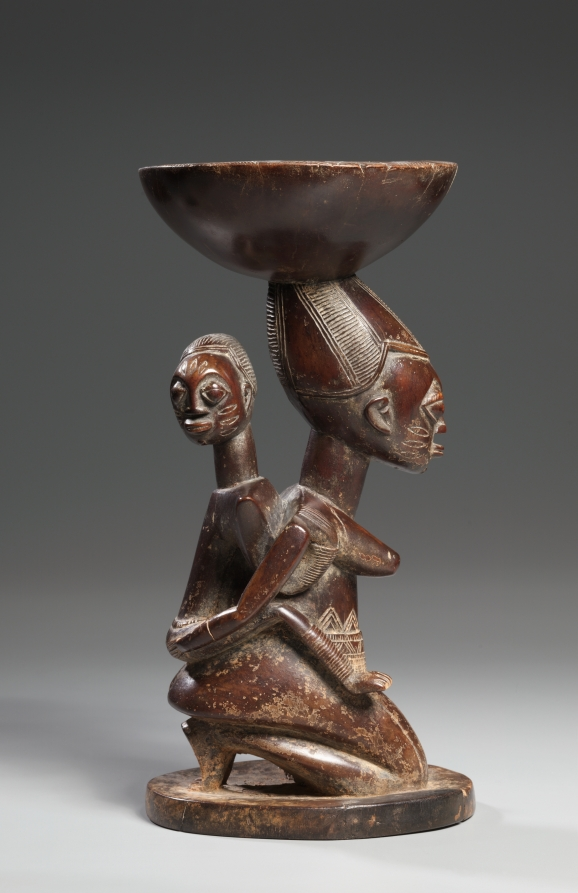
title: Ifá divination vessel (àgéré Ifá)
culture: Africa, West Africa, Nigeria, possibly Èkìtì State, Yorùbá-style carver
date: mid- late 1800s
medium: Wood and colorant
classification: Sculpture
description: The mother figure of this vessel from the Southern Ekiti region represents a devotee who kneels before the gods. The vessel once held the 16 sacred palm nuts essential to divination rituals. The object was used by a priest as a medium through which to communicate with the god of fate, Orunmila, in order to gain insight into an individual’s destiny or to understand the cause of misfortune.